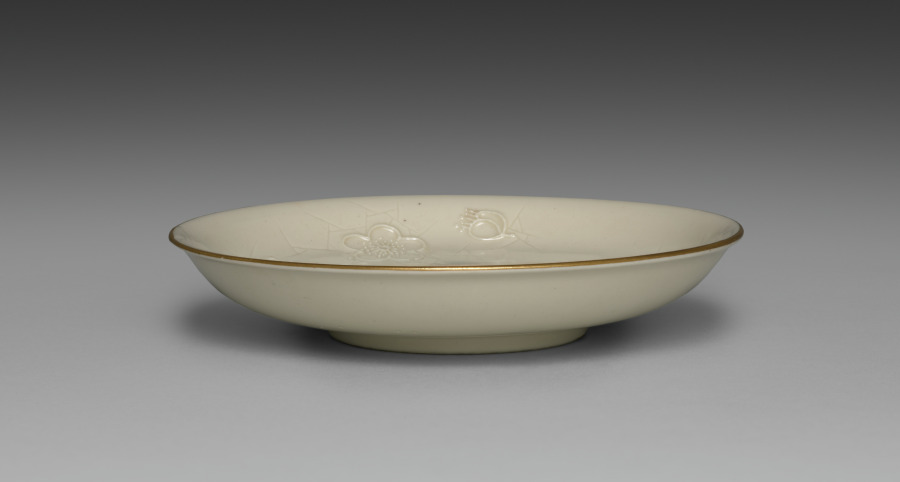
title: Medium-sized Dish from Dining Set with Plum Blossoms and Cracked-Ice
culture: Japan, Meiji period (1868–1912)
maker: Seifū Yohei II (Japanese, 1844–1878)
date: c. 1875–78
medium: Porcelain with molded designs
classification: Ceramic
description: Each item in this set has a delicate low-relief design of flowering plum branches over scattered, intersecting lines meant to resemble the cracked-ice surface of a frozen body of water and is signed on the base in gold pigment. While Yohei II produced many fine works in underglaze blue, like those produced by Kiyomizu Shichibei, he also made works in quite different styles later in his career, from the early 1870 s. In 1873, he was appointed purveyor to the Industrial Center of Kyoto Prefecture, a designation associated with Kyoto’s efforts to reach an international market through the port of Kobe; and from 1875 until his death, he was involved in national-level projects to present Japanese ceramics across the world. It was during this period that Yohei III was apprenticed to Yohei II, and it has been suggested that this set may in fact be an early example of Yohei III’s work, which he signed with his teacher’s name. Decorated with flowers resembling Japanese textile motifs, the set calls to mind the design of Yohei II’s pair of vases with plum blossoms in the Victoria and Albert Museum. Here, the elaborate trees created for a formal public exhibition setting have been translated into the approachable blossoms of the genteel domestic environment. While the designs are consistent across the pieces, each raised flower petal and pistil and each incised line in the ice was done by hand, so the cups, bowls, and dishes are similar yet unique. The bottoms of two boxes once identified the set’s owner, but the information has been deliberately obscured with black ink. However, inscriptions still visible appear to indicate two occasions, once at the end of July 1886 , and once again in June 1916 , when parts of the set were requested from Hokura in Niigata Prefecture. The location corresponds to a neighborhood in the present-day city of Jōetsu. The surname Tsuji 辻 also appears on a paper tag affixed to one of the box cloths. Future research may possibly reveal more about their provenance. A vase by Yohei III in a private collection combines the formal grandeur of the Yohei II vases in the Victoria and Albert Museum with the gentler design of this dining set, placing flowering plum trees against soft, scalloped-edge clouds resembling those in golden screens.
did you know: The dining wares have a creamy white coloration that the four boxes containing them identify as Korean in style.